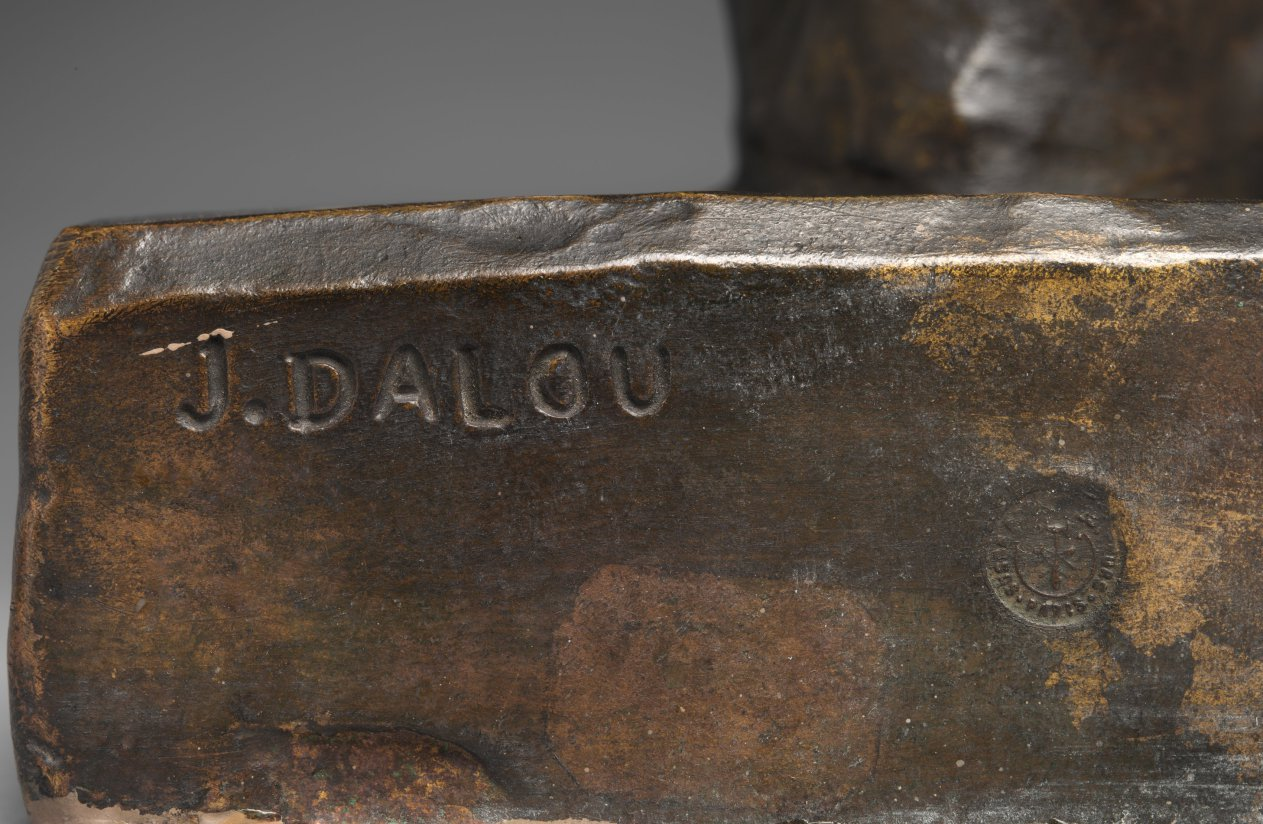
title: Torso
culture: France, 19th century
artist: Jules Dalou (French, 1838–1902)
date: c. 1850 – 1899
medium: bronze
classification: Sculpture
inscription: Signed: "J. Dalou"; "Susse Fres. Ed[ts] Paris"